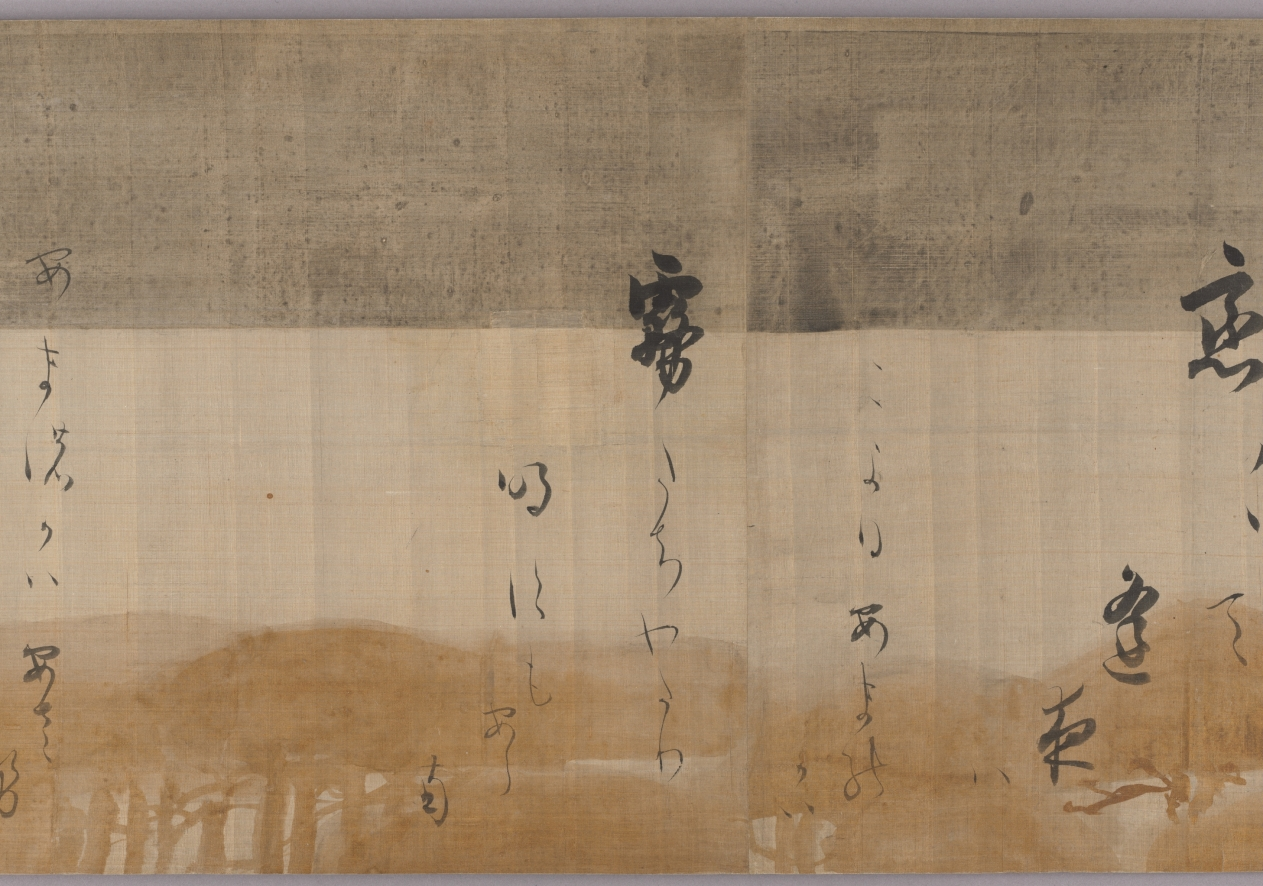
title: Selections from the Collection of Japanese Poems from Ancient and Modern Times (Kokin wakashū) with Design of Pines Along the Shore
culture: Japan, Momoyama period (1573-1615) to Edo period (1615-1858)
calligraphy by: Hon'ami Kōetsu (Japanese, 1558–1637)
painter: attributed to Tawaraya Sōtatsu (Japanese, c. 1570–c. 1640)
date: 1600s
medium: handscroll; ink on silk with gold and silver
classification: Calligraphy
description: The calligrapher and craftsman Hon’ami Kōetsu frequently collaborated with Tawaraya Sōtatsu, a painter who ran a studio that produced fans and screens. Sōtatsu’s work featured abstracted and flattened shapes, fields of color and gold, and asymmetry. In particular, motifs that appeared in small scale, such as flora and fauna, in early decorated Japanese papers were painted in a larger scale—blown up as if seen under a magnifying glass. For this handscroll, Kōetsu brushed poems from the autumn section of a poetry anthology onto silk with a landscape of pines in gold and silver likely painted by Sōtatsu.